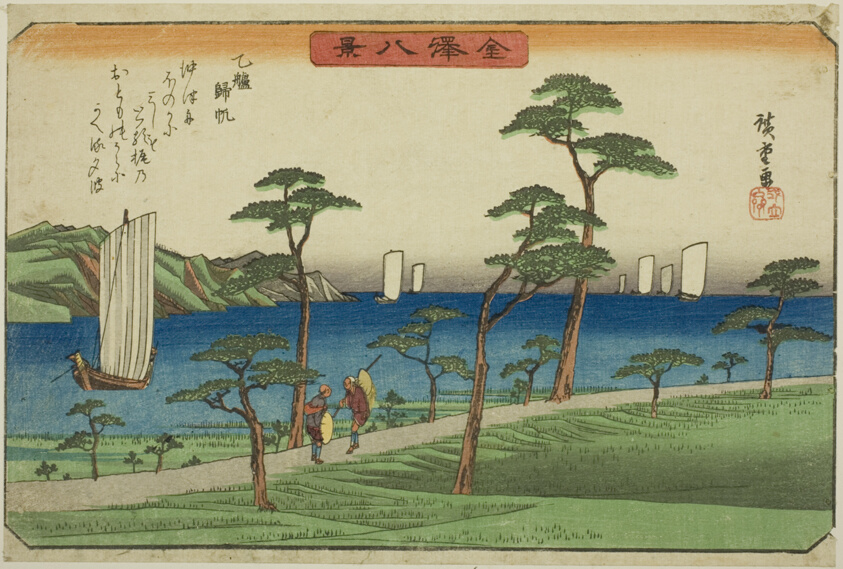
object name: Print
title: Returning Sails at Otomo (Otomo kihan), from the series "Eight Views of Kanazawa (Kanazawa hakkei)"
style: Japanese (culture or style)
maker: Utagawa Hiroshige 歌川 広重; Japanese, 1797-1858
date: c. 1835/36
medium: Color woodblock print; oban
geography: Japan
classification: woodblock print; print; asian art